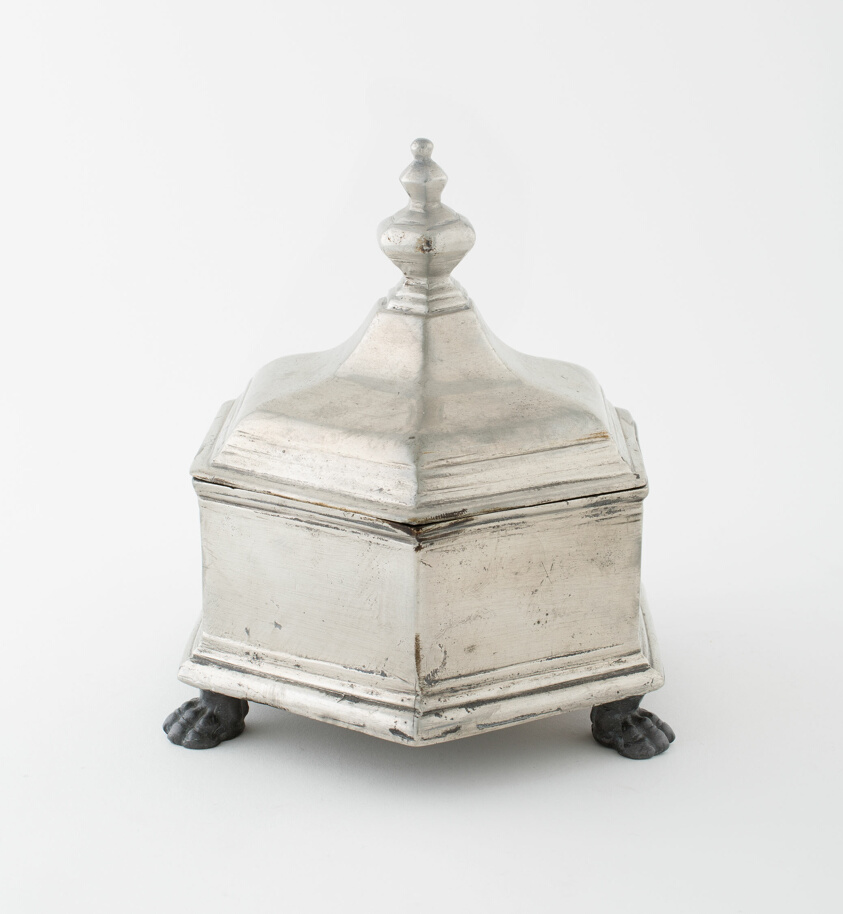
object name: Metalwork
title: Tobacco Box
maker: Netherlands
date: c. 1740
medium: Pewter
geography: Netherlands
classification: pewter; metalwork; european decorative arts